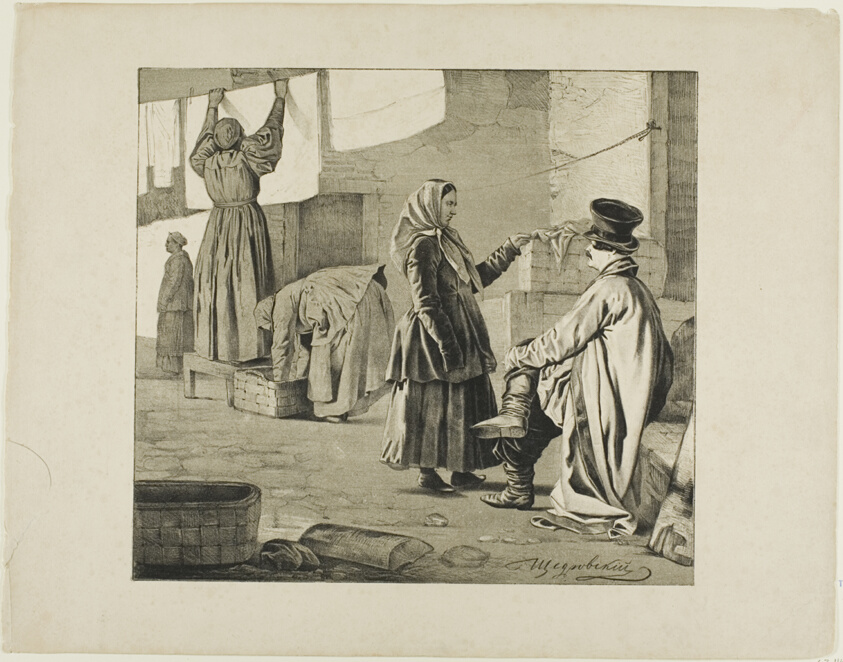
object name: Print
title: Scenes from Russian Folk Life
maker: Ignatii Stepanovich Shchedrovskii (Russian, 1815-1870)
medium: Color lithograph on paper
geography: Russia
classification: lithograph; print; prints and drawing